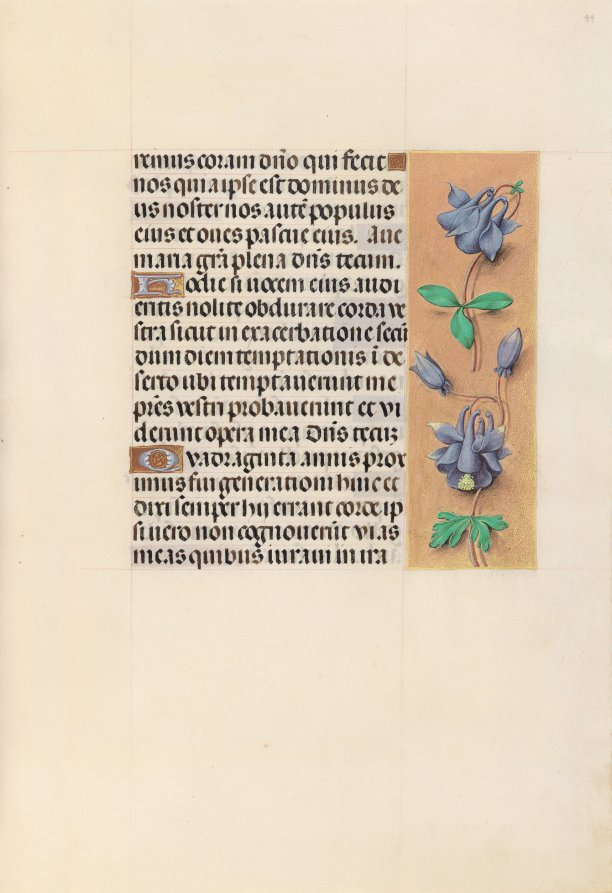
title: Hours of Queen Isabella the Catholic, Queen of Spain: Fol. 99r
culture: Flanders, Ghent and Bruges, late 15th century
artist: Master of the First Prayerbook of Maximillian (Flemish, c. 1444–1519)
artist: and Associates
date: c. 1500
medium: ink, tempera, and gold on vellum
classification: Bound Volume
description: This manuscript was illuminated by a circle of at least five highly organized manuscript painters active in the Flemish cities of Ghent and Bruges. The principal illuminator was Alexander Bening, who painted the majority of the book's miniatures. Manuscripts produced by this circle of artists are renowned for the decoration of their borders, which typically feature a rich variety of realistically-painted flowers, birds, and butterflies. This prayer book, called a book of hours, was intended not for a cleric, but for the private devotions of a lay person-in this case, Isabella the Catholic, Queen of Spain (1451-1504). Isabella's coat of arms embellishes the book's frontispiece. It is unlikely that the book was commissioned by the Queen herself; rather, she probably received it as a diplomatic gift from someone courting her patronage, perhaps Cardinal Francisco Jimenez de Cisneros. A Franciscan friar, Jimenez was dependent upon Isabella for his advancement, first to the post of Queen's confessor in 1492, and then to Archbishop of Toledo in 1495.